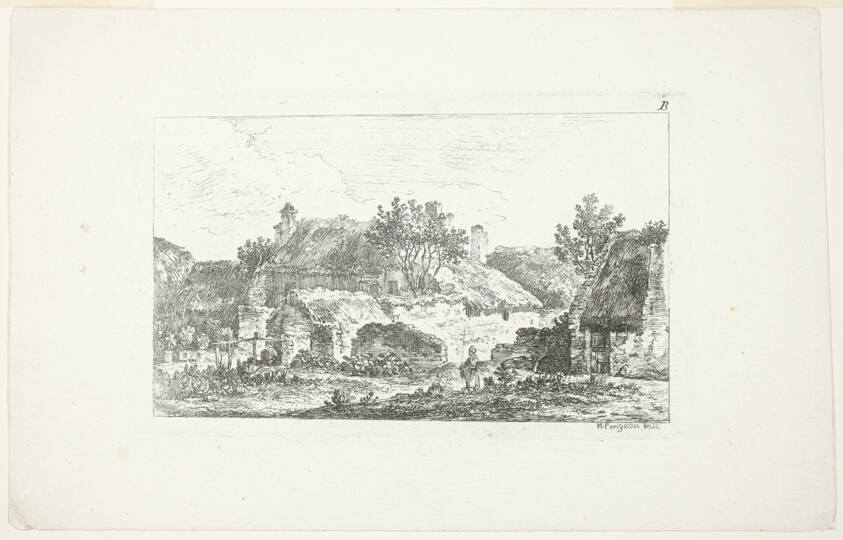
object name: Print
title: Landscape, from Deuxieme Cahier de Paysage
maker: Nicolas Pérignon (French, 1726-1782)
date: 1772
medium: Etching on off-white laid paper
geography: France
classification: etching; paper; print; prints and drawing